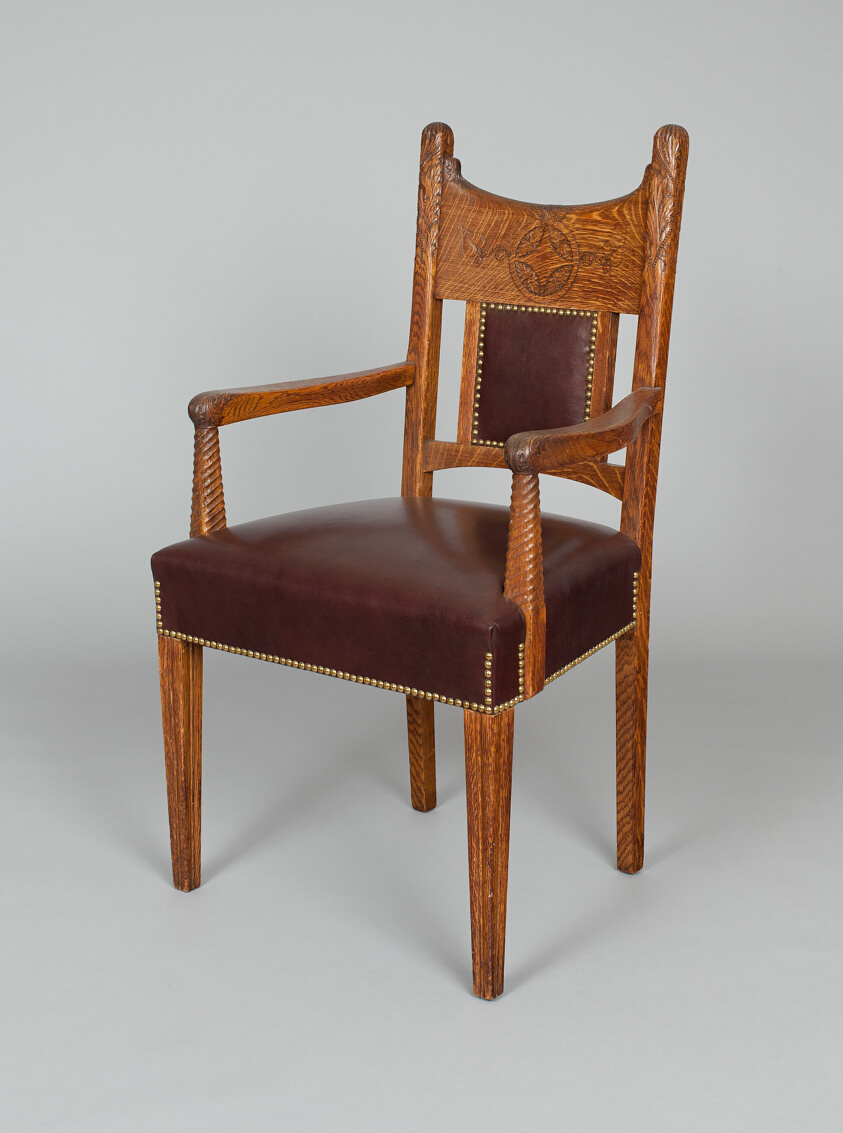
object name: Furniture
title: Armchair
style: Arts and Crafts Movement, American Arts and Crafts Movement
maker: Design attributed to Francis H. Bacon (American, 1856–1940); A. H. Davenport & Company (American, 1875–1910); Boston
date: c. 1885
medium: Oak and upholstery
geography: Boston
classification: seating; furniture; american decorative arts; american arts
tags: furniture